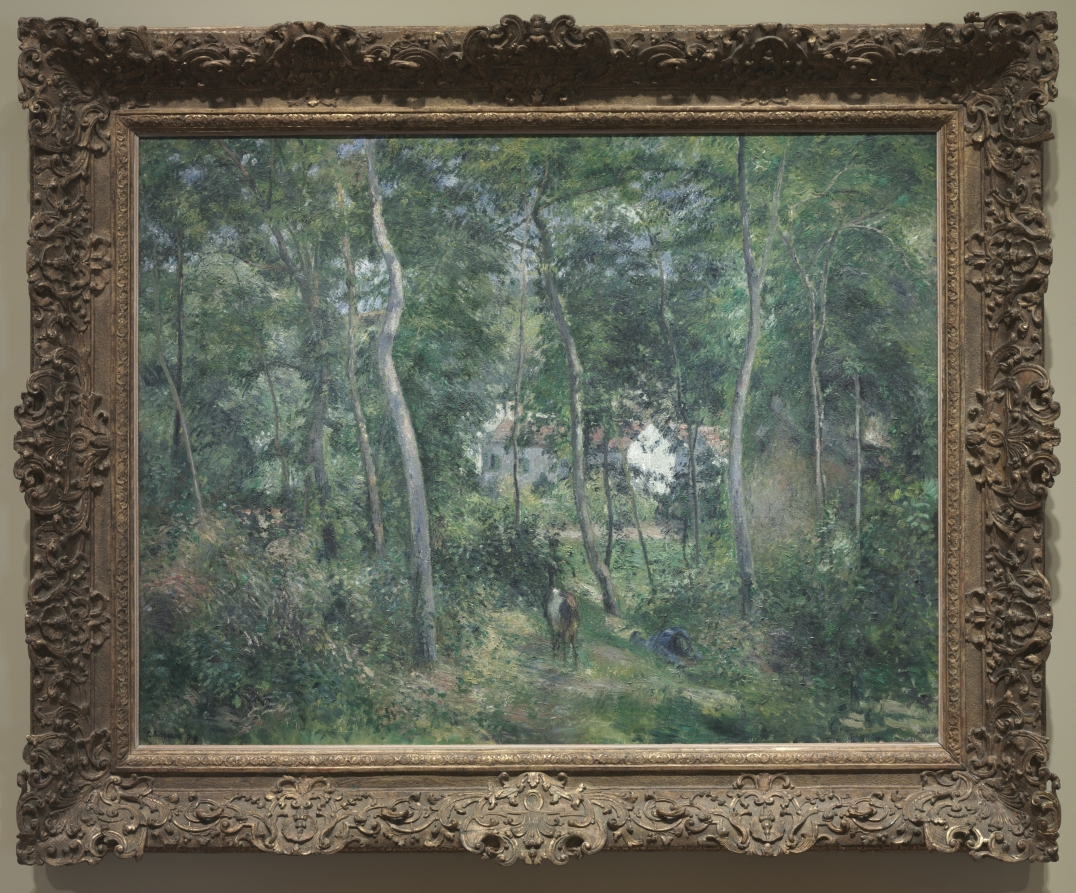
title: Edge of the Woods Near L'Hermitage, Pontoise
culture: France, 19th century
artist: Camille Pissarro (French, 1830–1903)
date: 1879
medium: oil on fabric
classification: Painting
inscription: Signed lower left: C. Pissarro 79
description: Born to a French-Jewish family on St. Thomas island in the Caribbean, Pissarro painted this monumental landscape when he was desperately poor and struggling to sell his paintings. It depicts a man slumbering in the sun-dappled backwoods of the Hermitage, a rural village near Pontoise, where the artist had been living since 1872. Restricting his palette to pure hues, Pissarro applied brushstrokes in systematic diagonal patterns, producing an effect that he likened to knitting. This canvas was included in the fourth Impressionist exhibition of 1879.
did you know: A goat seen from the back standing next to the figure in blue laying in the grass invites the viewer to step inside this serene and beautiful setting.